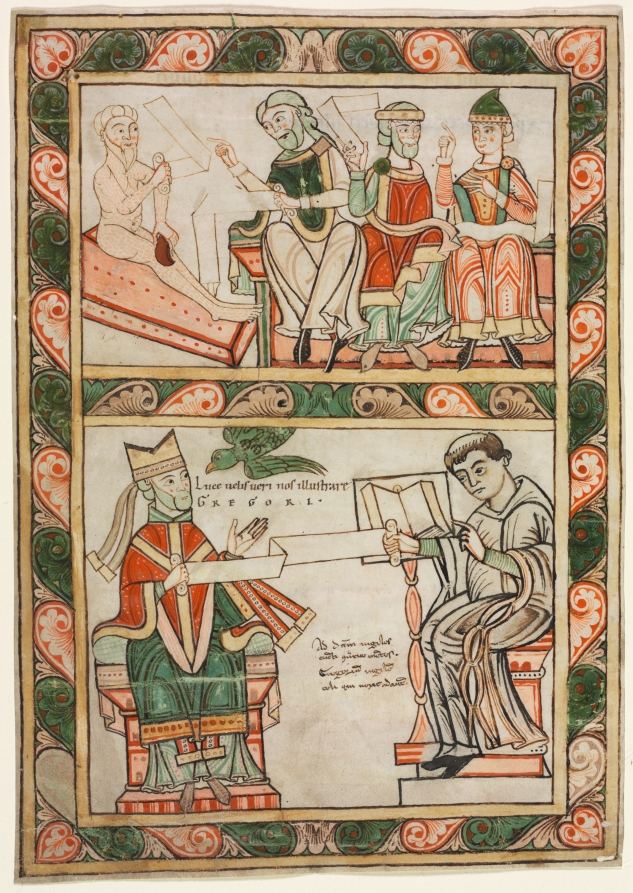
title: Title Page of St. Gregory's "Moralia": Job Visited by His Three Friends (above) and Gregory the Great and His Deacon Peter (below)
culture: Switzerland, Monastery of Engelberg, 12th century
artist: probably by Abbot Frowin (Swiss)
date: c. 1143–1178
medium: ink, tempera, and gold on vellum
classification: Manuscript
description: This leaf originally formed the title page of a four-volume Moralia (Commentary on the Book of Job) by Gregory the Great, pope and father of the Latin Church. The books still survive in the library of the Monastery of Engelberg, near Lucerne. Both the copying and illumination of the books are attributed to the hand of Engelberg's greatest abbot, Frowin, who ruled from 1143 to 1178. Frowin seemed to be responsible, either as a writer, illuminator, or donor, for nearly 30 manuscripts still preserved at that monastery.